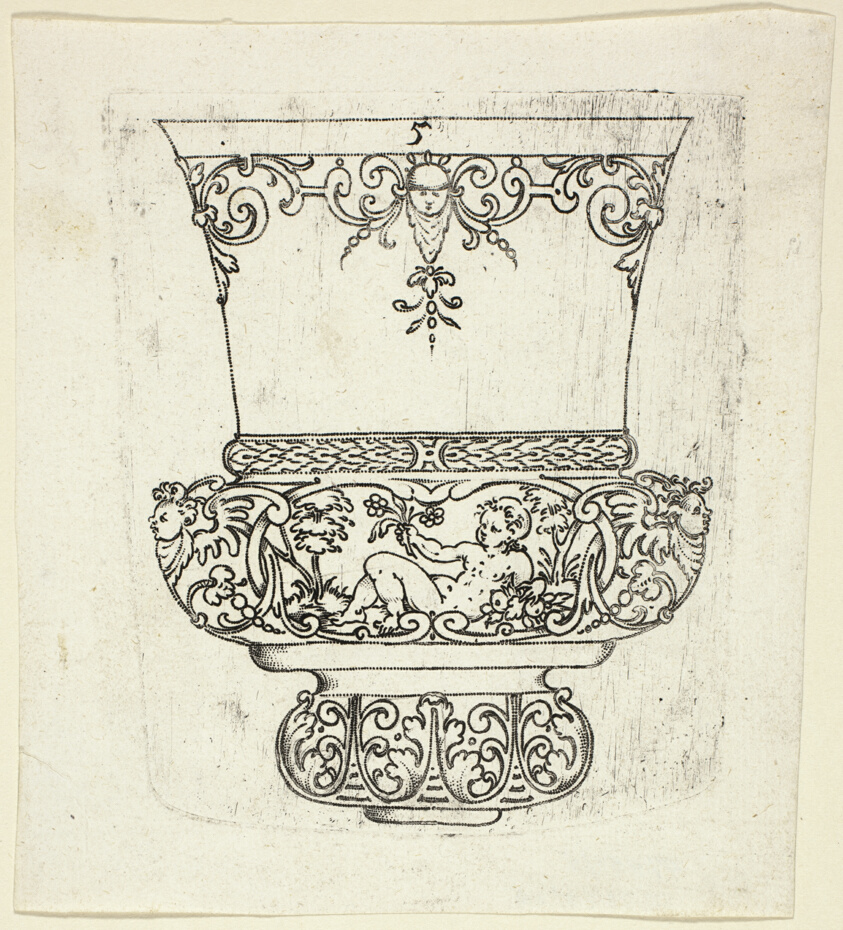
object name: Print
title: Plate 5, from twenty ornamental designs for goblets and beakers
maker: Master A.P. (German, active early 17th century)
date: 1604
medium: Punch engraving in black on ivory laid paper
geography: Germany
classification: engraving; print; prints and drawing